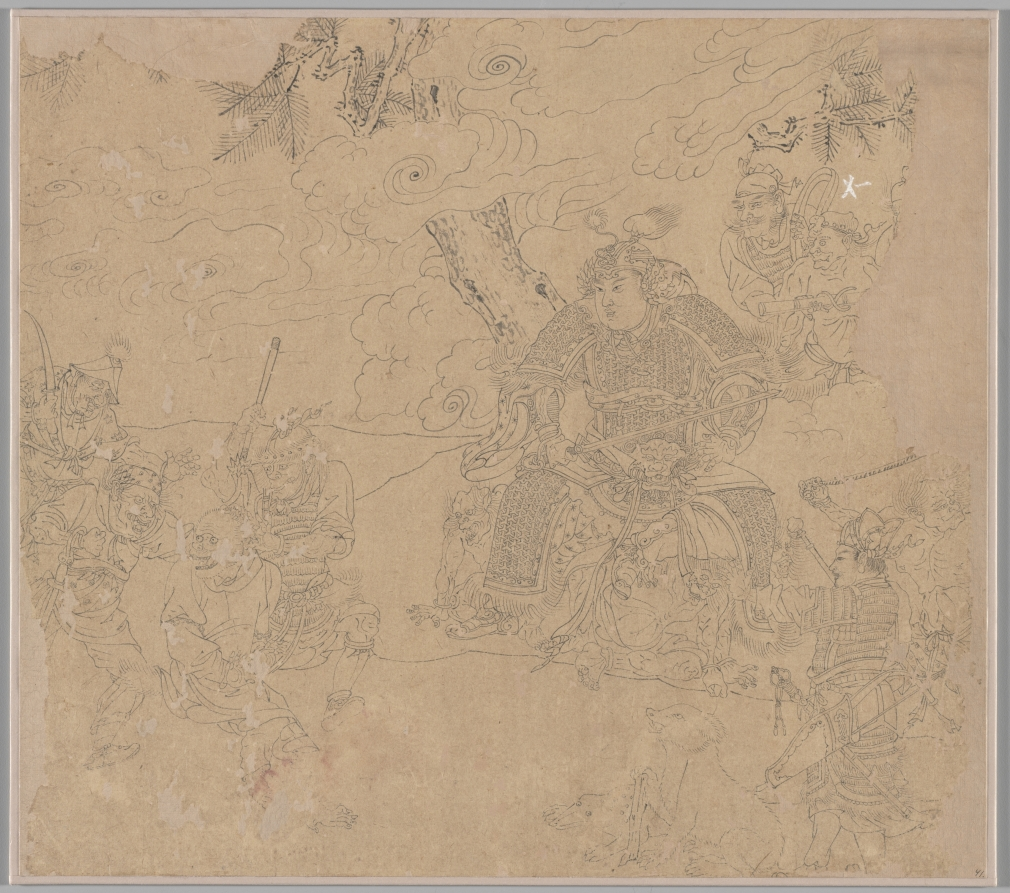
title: Album of Daoist and Buddhist Themes: Search the Mountain: Leaf 41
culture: China, Southern Song dynasty (1127-1279)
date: 1200s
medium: Album, ink on paper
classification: Painting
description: The principal—and largest—figure in this leaf depicts Erlang, a celestial commander in a popular myth. Here he wears full armor and holds his sword. Seated by a pine tree, he orders his celestial army to rid Mt. Guankou of the undesirable creatures in the wilderness, including a wolf, a small alligator, and a monkey dressed in human clothes. This subject was first painted by a Northern Song artist, Gao Yi, and remained popular through the Southern Song period and during the Ming dynasty. In this album, the Soushan Tu 搜山圖 (Search the Mountain) uses 10 leaves to complete its imagery. This is now the earliest known version of the narrative, as Gao Yi’s has not survived.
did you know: A commander in armor is seated on a devil, surrounded by three more. One of his lieutenants (right) is whirling a snake in the air. On the left, demon-soldiers surround a monkey with human body.